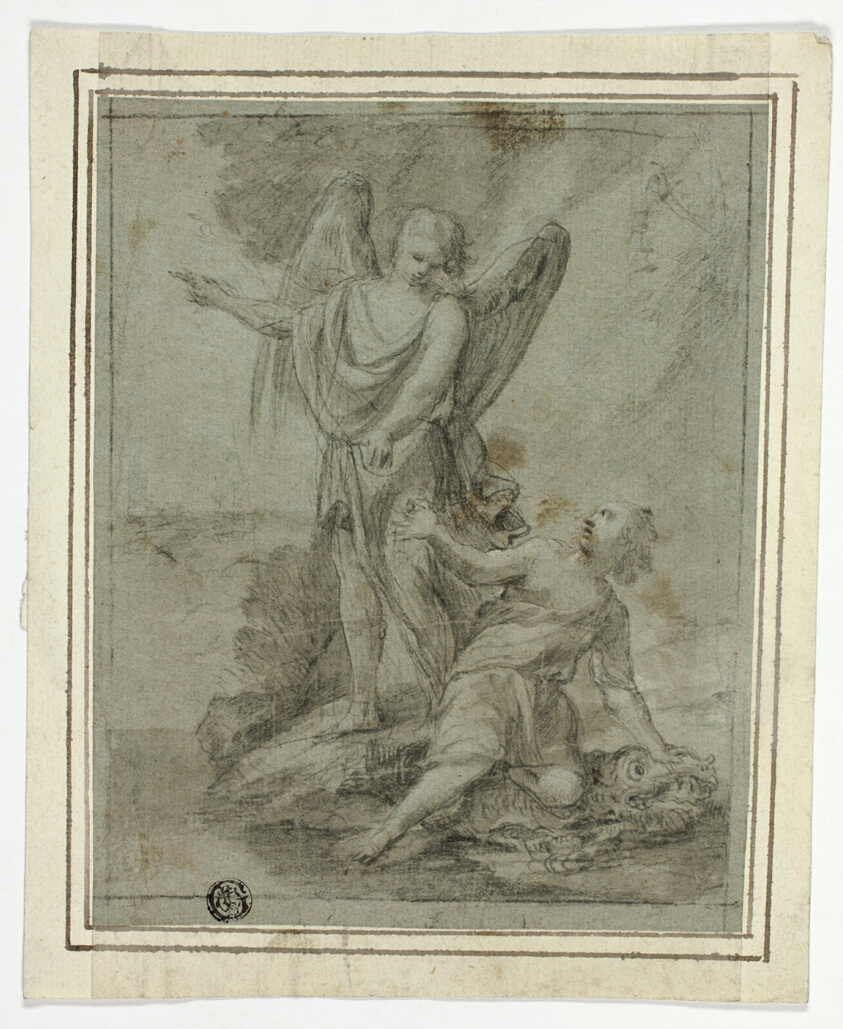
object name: Drawing and Watercolor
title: Tobias and the Angel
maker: Style of Laurent de La Hyre (French, 1606-1656)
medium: Black crayon, with brush and gray wash, on blue laid paper, perimeter mounted on ivory laid paper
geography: France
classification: chalk; drawings (visual works); prints and drawing